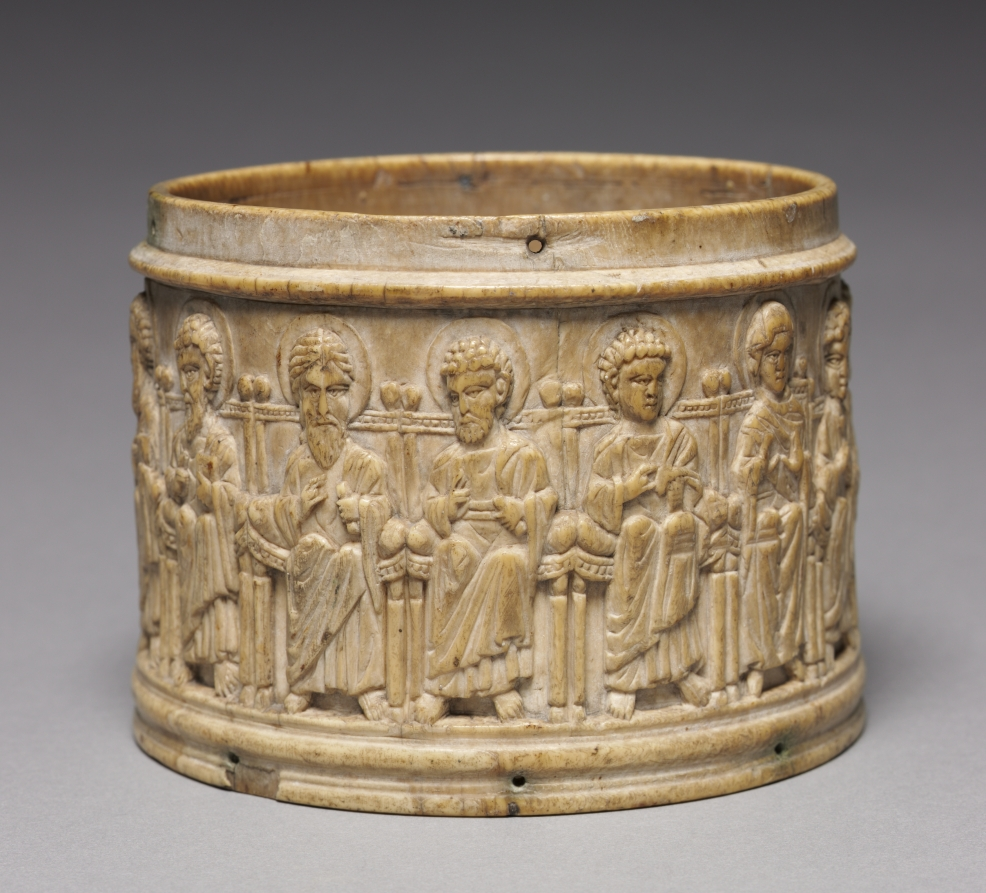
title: The "Apostles" Pyx (Box)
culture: Byzantium, Constantinople, middle Byzantine period, 10th-11th century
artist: probably by Triptych Group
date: c. 980–1010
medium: ivory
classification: Ivory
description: This pyx shows Christ as Pantokrator (Ruler of the World), the Apostles, and the Virgin as a continuous frieze of figures seated in high-backed chairs with cushions. The tapered lip of the body of the pyx was intended to dovetail into the missing lid. Because of its style, the box is thought to be from a workshop of ivory carvers called "The Triptych Group" active in Constantinople between about 950 and 1010. This is the only known pyx to survive from the Middle Byzantine period (about ad 843-1204).